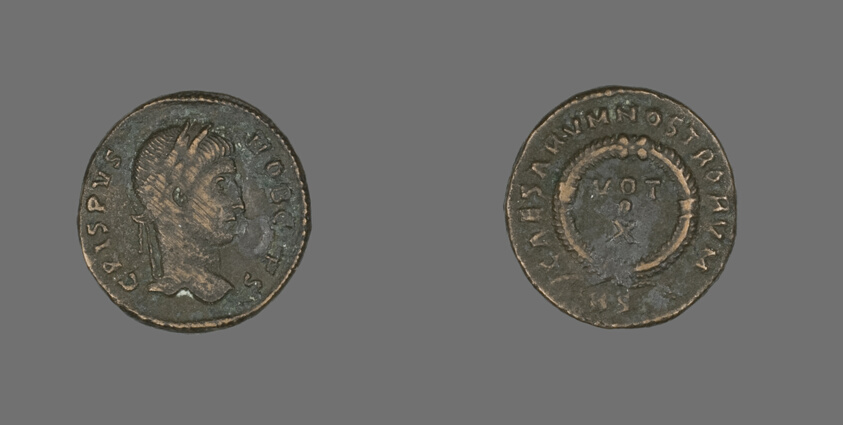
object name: Coin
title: Coin Portraying Emperor Crispus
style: roman (ancient, style or period)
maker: Roman, minted in Rome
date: 323-324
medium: Bronze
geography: Roman Empire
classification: coin; ancient art